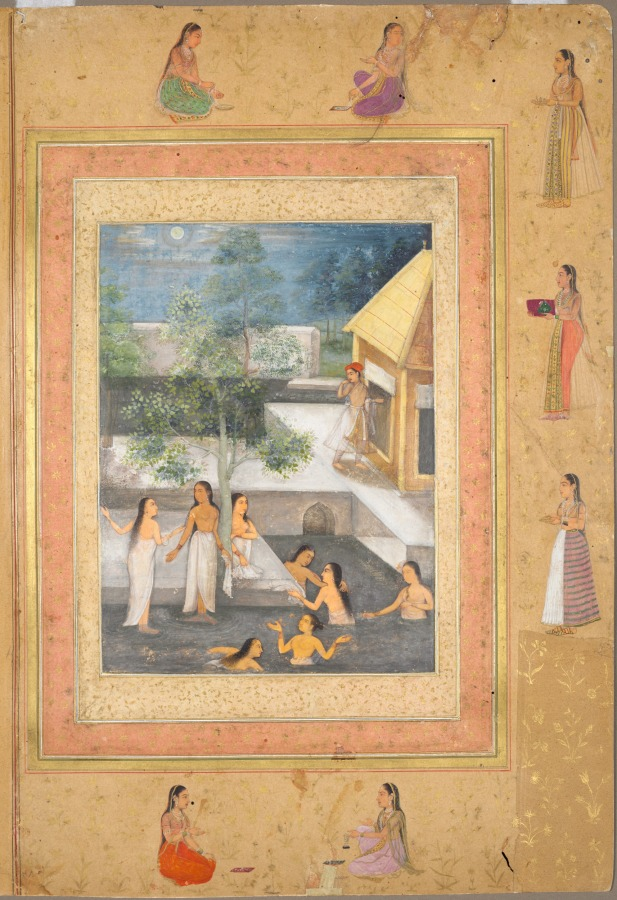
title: Harem night-bathing scene, from the Late Shah Jahan Album (recto)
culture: Mughal India, court of Shah Jahan (reigned 1628–58)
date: c. 1653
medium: Gum tempera, gold, and ink on paper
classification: Painting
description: The subject of women bathing persisted throughout the 1500s and into the 1600s. Akbar’s grandson Shah Jahan—the Mughal emperor who built the Taj Mahal—continued to support the work of artists in the imperial atelier. His taste was more formal and subdued, without as much interest in illuminations of fantastic tales. This scene is a single painting mounted in an album. The white marble terraces glow under the moonlight. An attendant carrying a cloth over one arm looks on with awe at the beauty of the scene. He is probably a eunuch, since men were not permitted to serve in the women’s quarters of a Mughal palace.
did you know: The fully dressed women in the top and bottom border examine strings of pearls and other jewelry pieces while the attendants on the side bring perfumes and containers probably with other jewels for inspection.